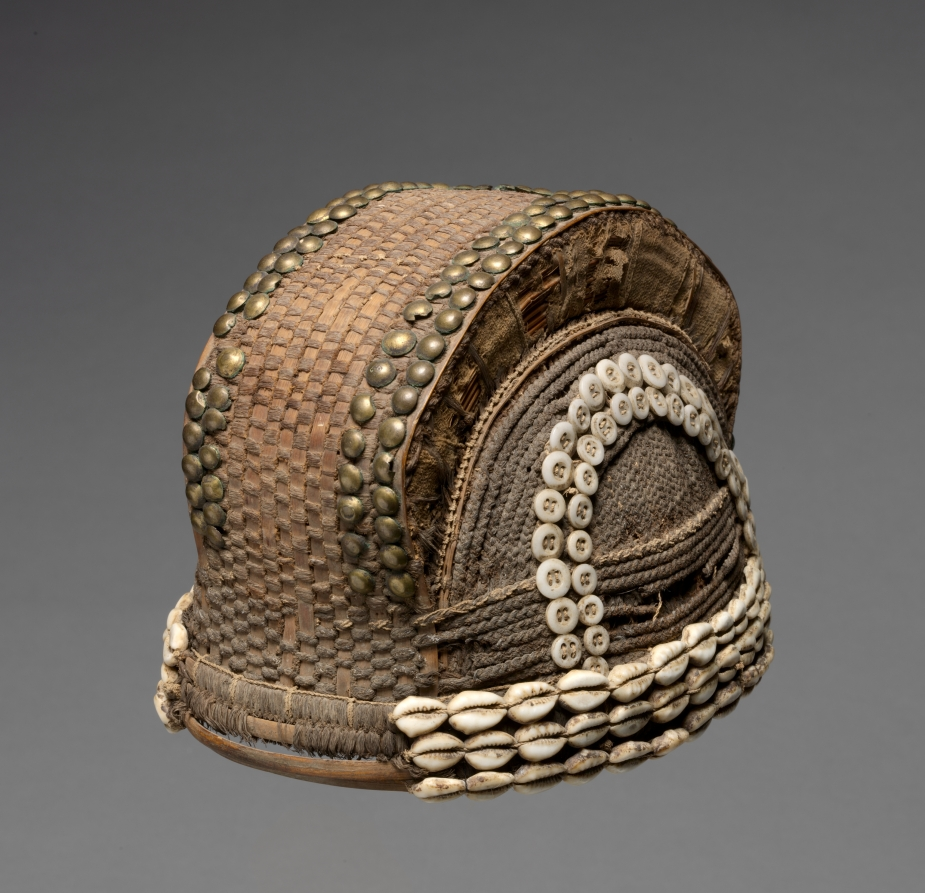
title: Headpiece (nlo-o-ngo)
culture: Africa, Central Africa, Gabon, Fang style, unknown maker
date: early 1900s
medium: Plant fibers, cloth, hair, cowrie shells, buttons, upholstery studs, and thread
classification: Garment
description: This headpiece (nlo-o-ngo) was made to look like a similarly shaped hairstyle. While the coiffure gained height from inserts tucked under the hair, here the underlying basket was woven into a central ridge. Plant fibers were woven or braided to mimic hairstyling techniques. Rarely removed, the hat gave the appearance of elaborately styled and decorated hair. Three rows of cowries around the band evoke a shell or bead headband, while the metal furniture tacks are the same as would have been inserted into the hair. Existing in many styles, men or women wore these wiglike headdresses to signify status, group identity, or social roles.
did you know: Sculptors depicted these characteristic headpieces and coiffures in figurative works that guarded the remains of ancestors.